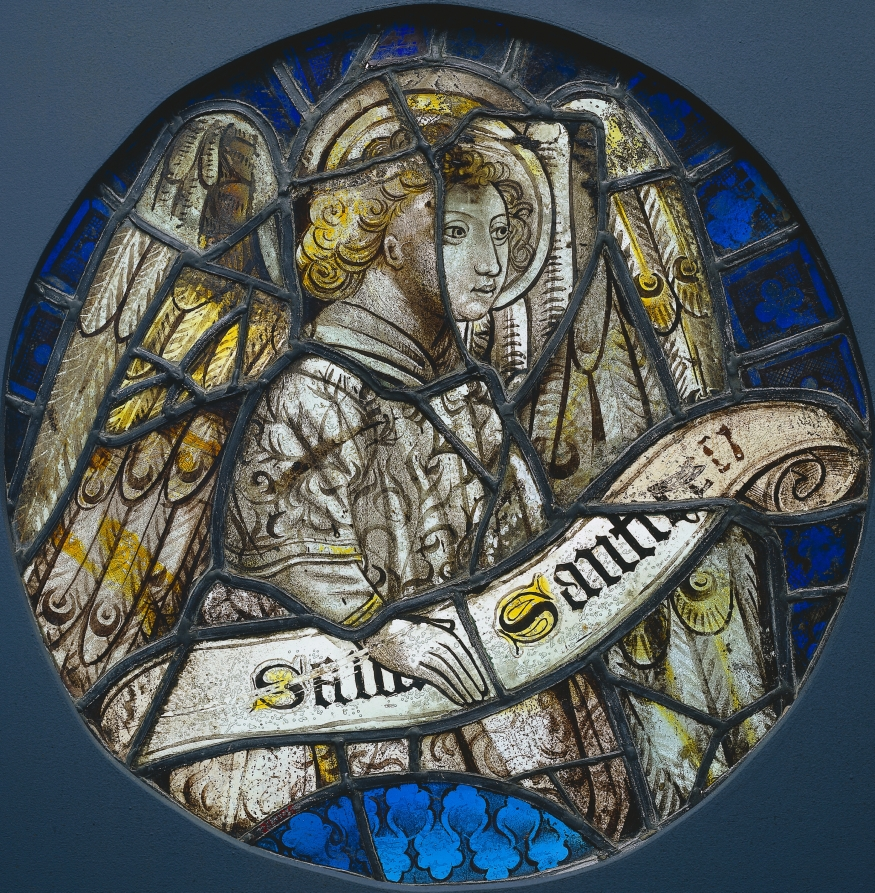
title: Stained Glass Roundel with an Angel Holding a Scroll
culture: France, 15th century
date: c. 1425–1450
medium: Stained glass (pot-metal and painted grisaille)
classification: Glass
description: The term pot-metal refers to glass that received its color in the melting pot when various metallic oxides were added. It was then possible to paint the surface of the glass in order to outline, decorate, and define details such as eyes and hair--as may be observed on this stained glass panel.